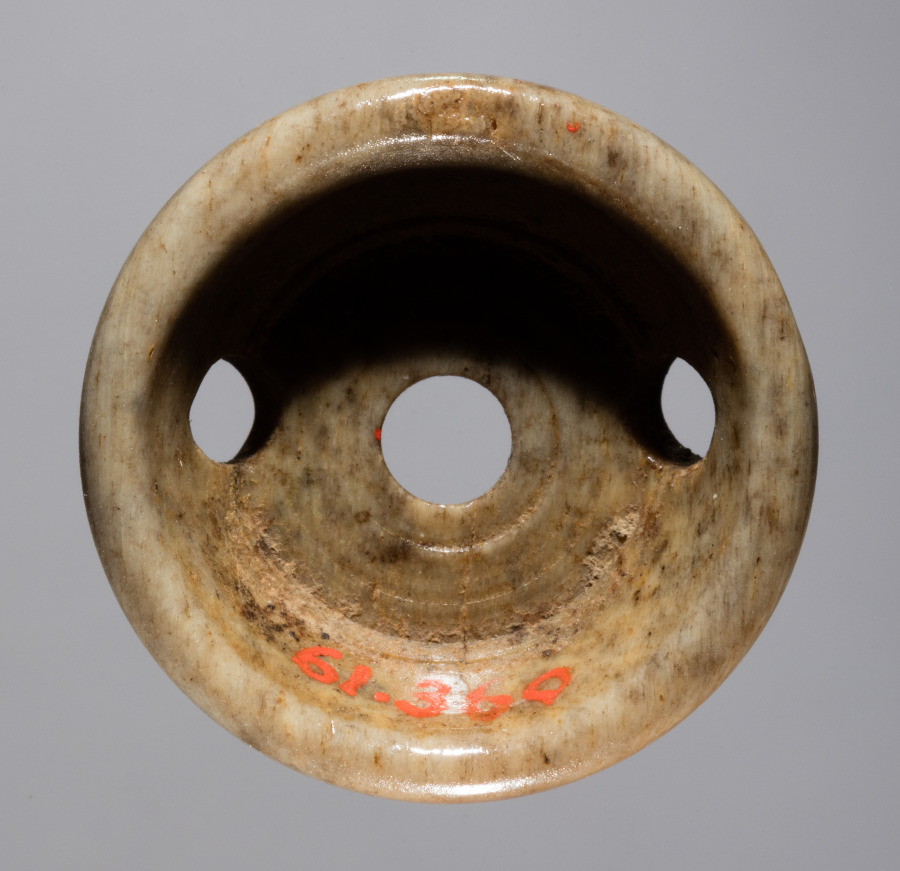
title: Spindle Whorl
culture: Iran, early Islamic period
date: 700s - 900s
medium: bone, incised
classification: Spindle Whorl